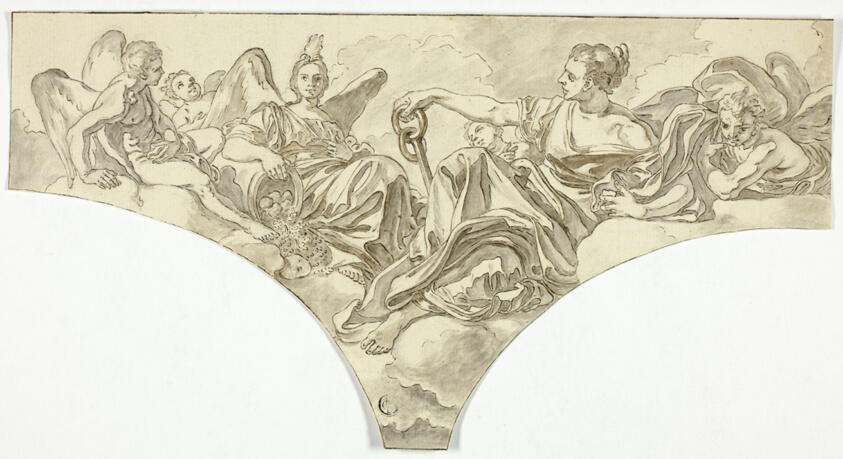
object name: Drawing and Watercolor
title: Spandrel Decoration with Seated Allegorical Figures of Hope and Concord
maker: After Francesco Solimena; Italian, 1657-1747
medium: Pen and brown ink with brush and brown and gray wash, over traces of black chalk, squared in black chalk on ivory laid paper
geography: Italy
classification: ink or chalk wash; drawings (visual works); prints and drawing